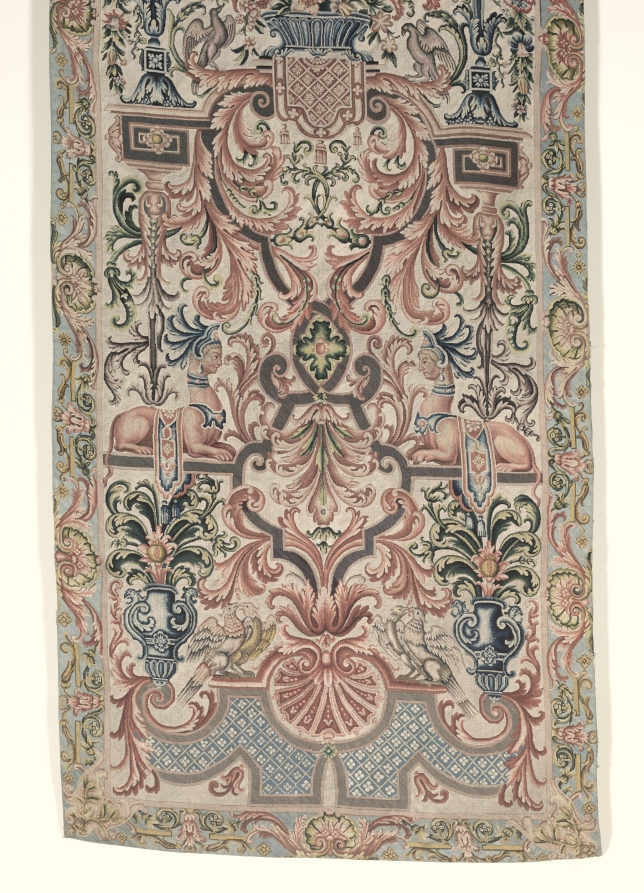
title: Needlework Bed Hanging (1 of 2)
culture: France, late 17th century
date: c. 1690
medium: petit point embroidery; silk and wool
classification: Embroidery